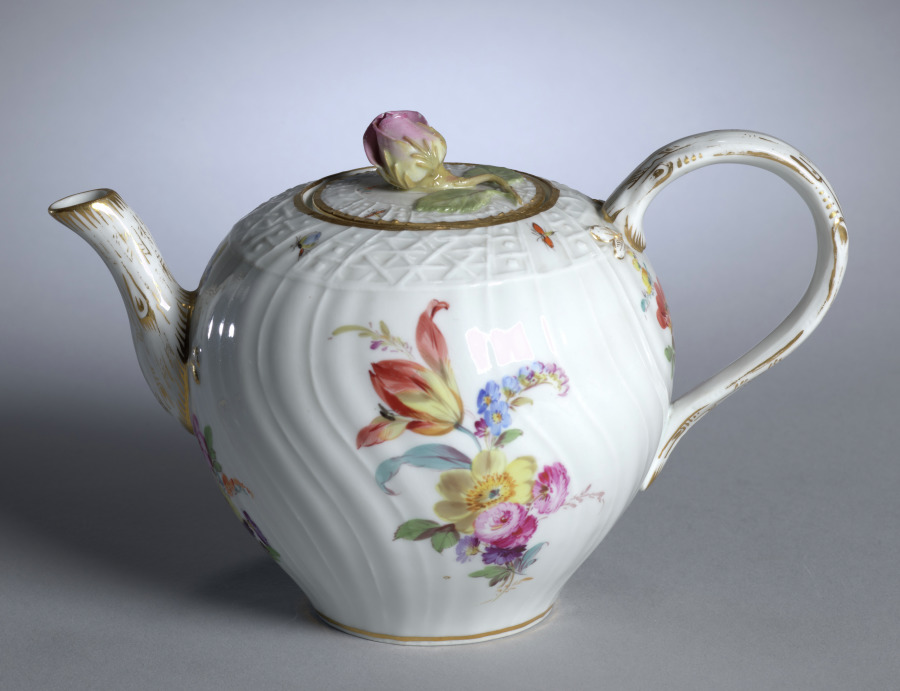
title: Teapot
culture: Germany, Meissen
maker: Meissen Porcelain Factory (German, est. c. 1710)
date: c. 1750–70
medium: porcelain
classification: Ceramic